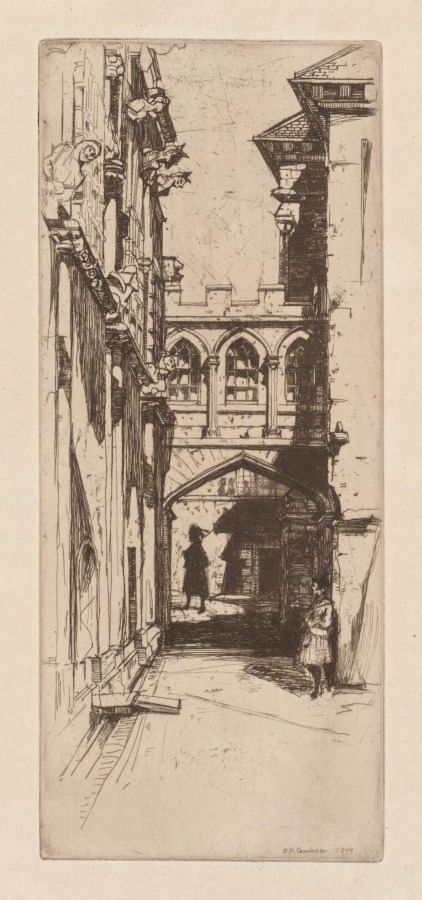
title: In Stirling Castle or A Scottish Palace (Un Palais Ecossais)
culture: Britain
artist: David Young Cameron (British, 1865–1945)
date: 1899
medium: Etching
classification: Print